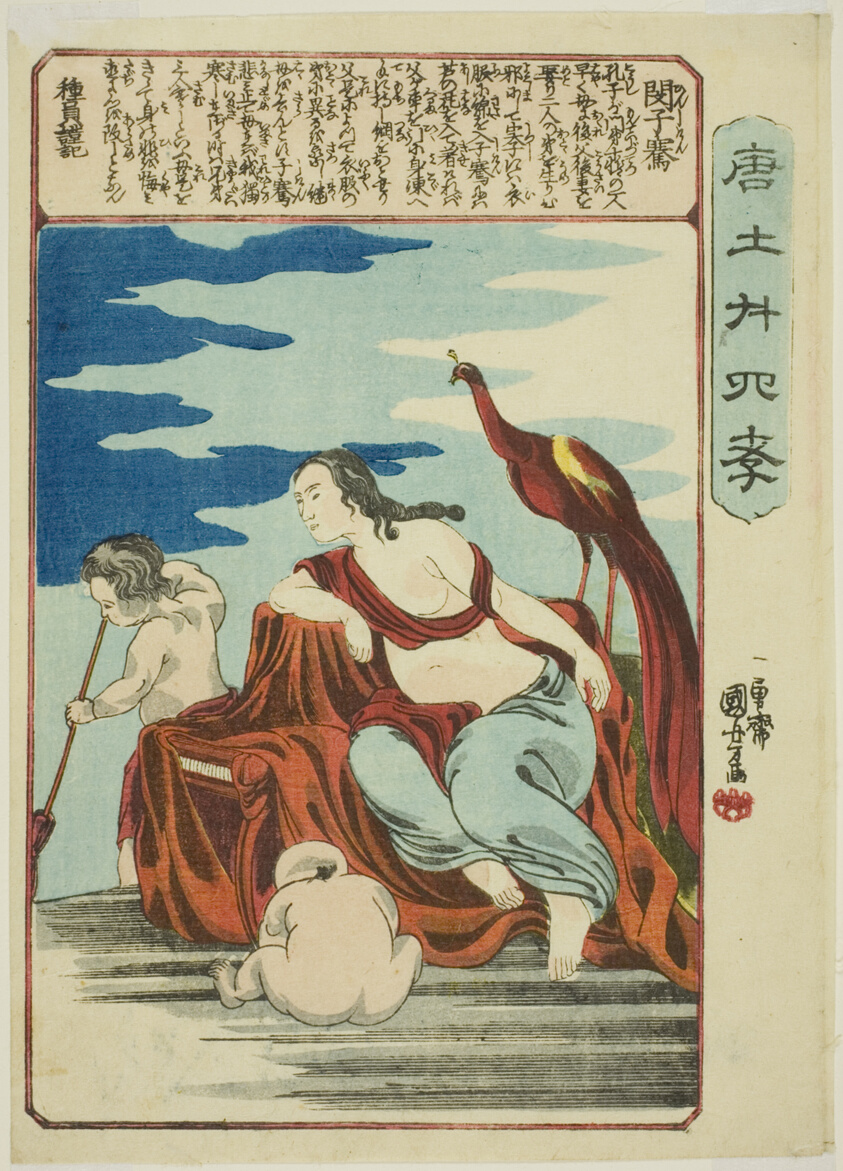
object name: Print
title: Min Ziqian (Bin Shiken), from the series "Twenty-four Paragons of Filial Piety in China (Morokoshi nijushiko)"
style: Japanese (culture or style)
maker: Utagawa Kuniyoshi (Japanese, 1797-1861)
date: c. 1848/50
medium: Color woodblock print; chuban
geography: Japan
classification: woodblock print; print; asian art